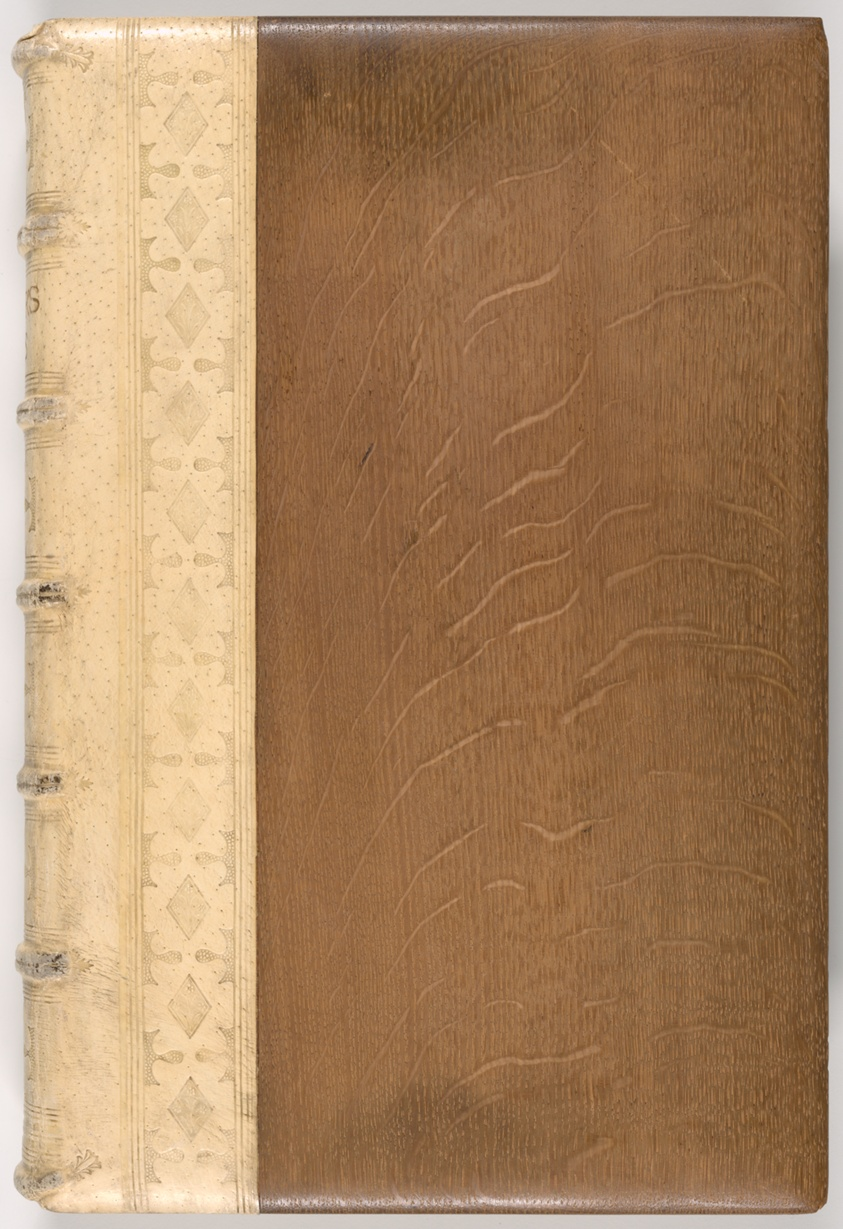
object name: Book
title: The Works of Geoffrey Chaucer Now Newly Imprinted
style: Arts and Crafts Movement, 19th century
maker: William Morris (English, 1834–1896); Illustrated by Sir Edward Burne-Jones (English, 1833-1898); Engraved by William Harcourt Hooper (English, 1834-1912)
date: 1896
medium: Hand-printed book on Batchelor linen paper, bound with tooled white pigskin on oak board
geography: England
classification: book; ink on paper